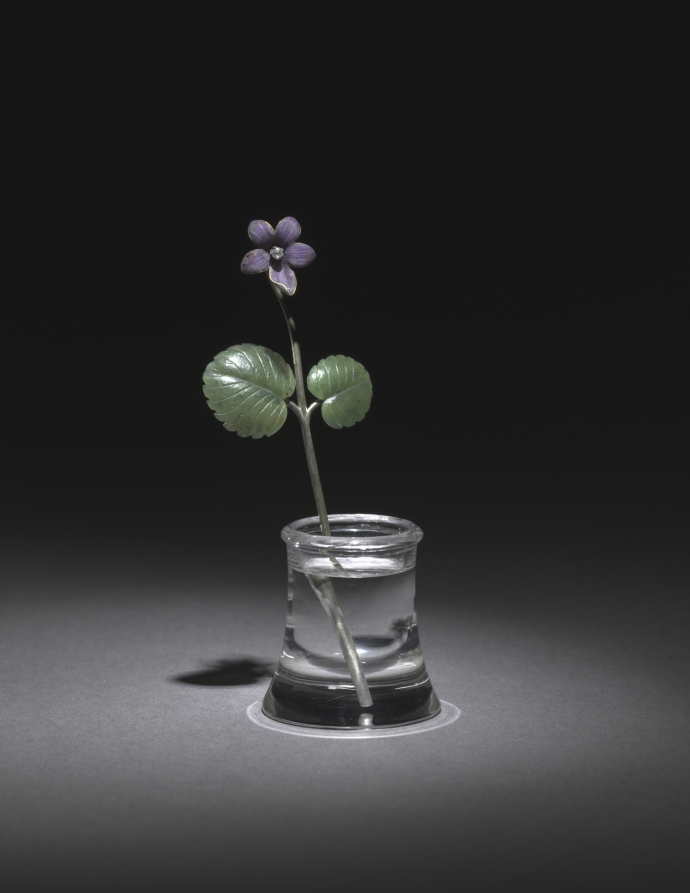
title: Flower Study of a Violet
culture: Russia, St. Petersburg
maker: House of Fabergé (Russian, 1842–1918)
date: c. 1885–1915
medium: enamel, silver gilt, jade, diamond, rock crystal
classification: Miscellaneous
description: This flower study depicts a single stem of violet. Fabergé’s inspiration for his flower studies is said to have come from the floral brooches of precious stones that were made in the 1700s for Catherine the Great as well as from the Japanese art of flower arranging, known as ikebana. Small and delicate, Fabergé’s flower studies were given as intimate gifts to friends by the tsarina and others in the court. She also liked to take them around to wherever the imperial family was residing as a reminder of spring during the harsh Russian winters.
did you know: The stems of Fabergé’s flower studies are set into little basins carved from rock crystal to resemble pots of water.